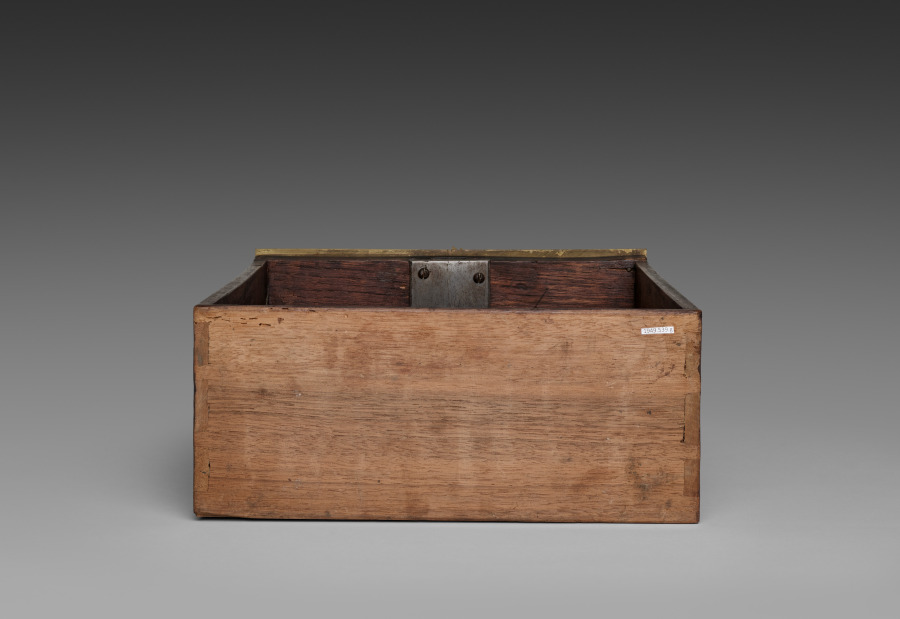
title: Side Drawer for Cabinet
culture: France, late 17th Century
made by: André-Charles Boulle (French, 1642–1732)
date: c. 1690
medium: ebony, marquetry in metal and tortoise shell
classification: Furniture and woodwork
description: Appointed cabinetmaker to King Louis XIV in 1672, André-Charles Boulle became a master of furniture making in France during the late 1600s until his death in 1732. Known primarily for his use of marquetry, in which metal patterns are inlaid into tortoiseshell then applied within the veneered surface of the furniture, Boulle established a level of quality and craftsmanship few others could achieve. As a result, his work found favor at the royal court and among other aristocrats and diplomats eager to impress the king. The inclusion of a medallion depicting Louis XIV within the bronze decoration of this chest would have identified the owner with the royal court. Often exhibiting stout architectural proportions with elegant groups of inlaid motifs such as the parrot on the central panel of this chest, Boulle’s designs are an example of the intellectual fashion for contrasting ideas, materials, and motifs.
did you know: Originally designed to sit atop an elaborate tall stand, this chest was likely altered in the late 1700s to reduce its scale and height.